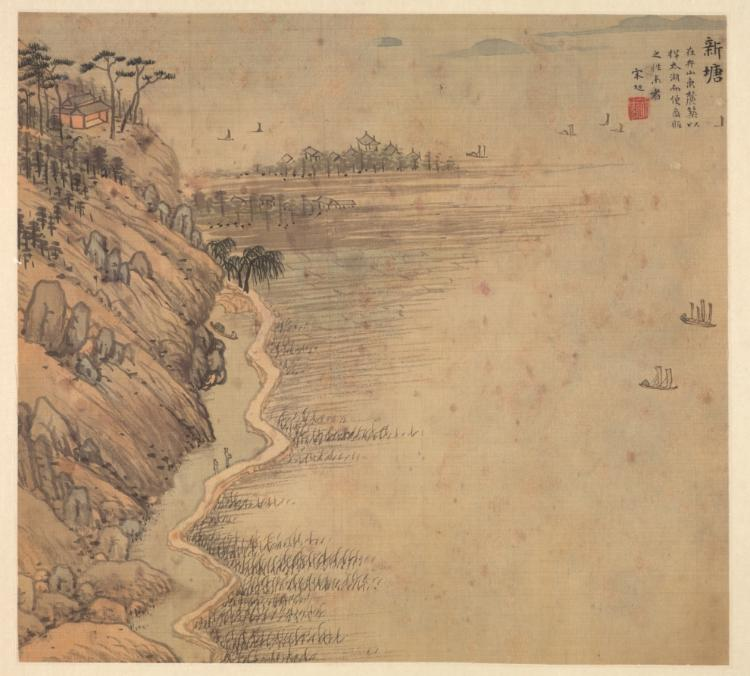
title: Xintang (Immortal's Peak)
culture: China, Jiaxing, Ming dynasty (1368–1644)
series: Eighteen Views of Huzhou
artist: Song Xu (Chinese, 1525-c. 1606)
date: c. 1588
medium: Album leaf; ink and color on silk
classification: Painting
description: By the 1500s, visits to historic and scenic sites in the lower Yangzi delta stimulated an increase of printed illustrated travel books. Topographical depictions of local scenery flourished. Leaves from this album illustrates sites around Lake Tai of the two adjacent counties Changxing and Wuxing (modern Huzhou). Song Xu, who lived intermittently in Jiaxing and Songjiang, must have passed through Wuxing by boat and thus knew the region. The paintings are inscribed with gazetteerlike notations, suggesting that the album was produced for clients as commemorative works, a travel guide, or for “armchair travel” (woyou) in one’s mind.